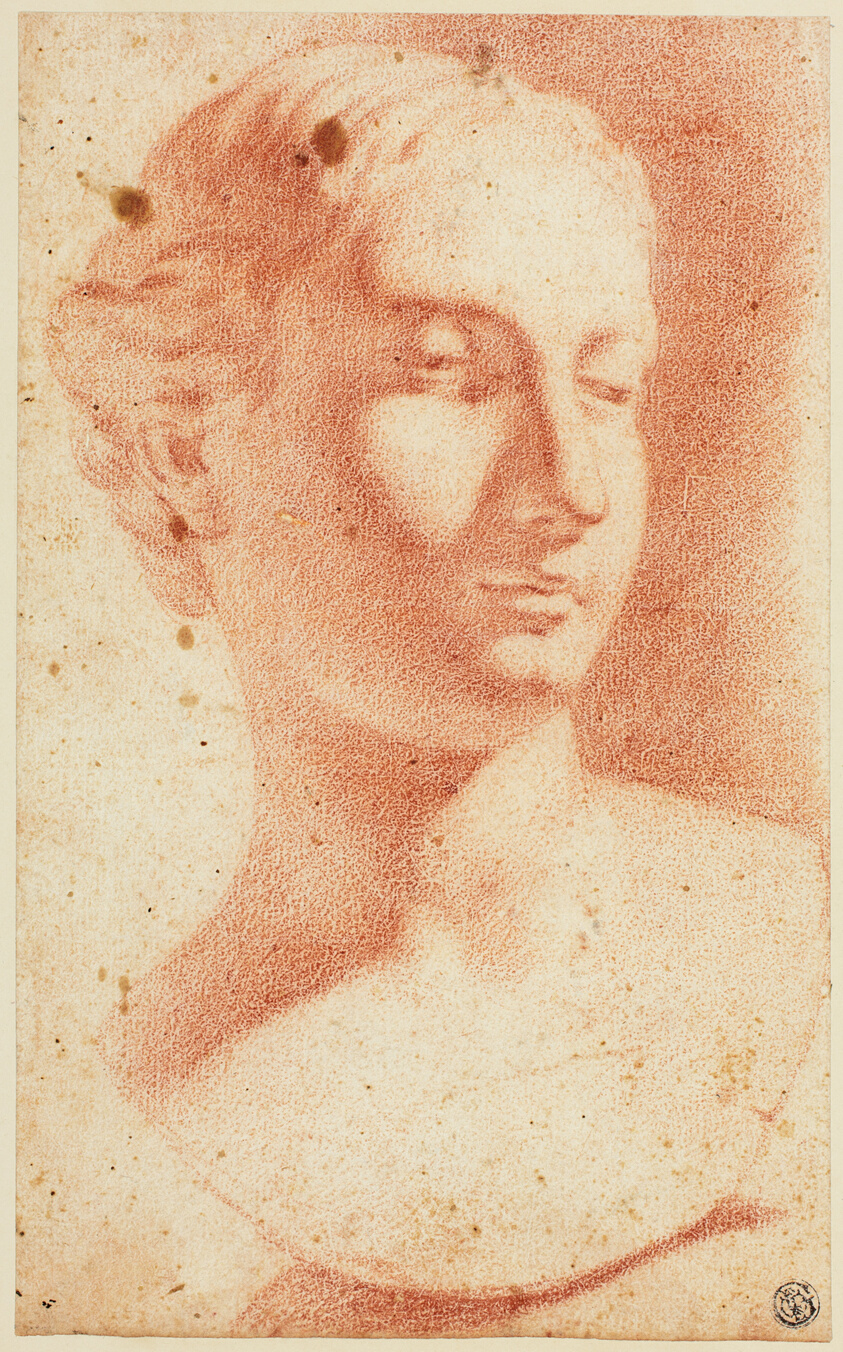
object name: Drawing and Watercolor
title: Female Bust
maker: Attributed to Pietro Dandini; Italian, 1646-1712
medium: Red chalk on ivory laid paper, laid down on board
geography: Italy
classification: chalk; drawings (visual works); prints and drawing